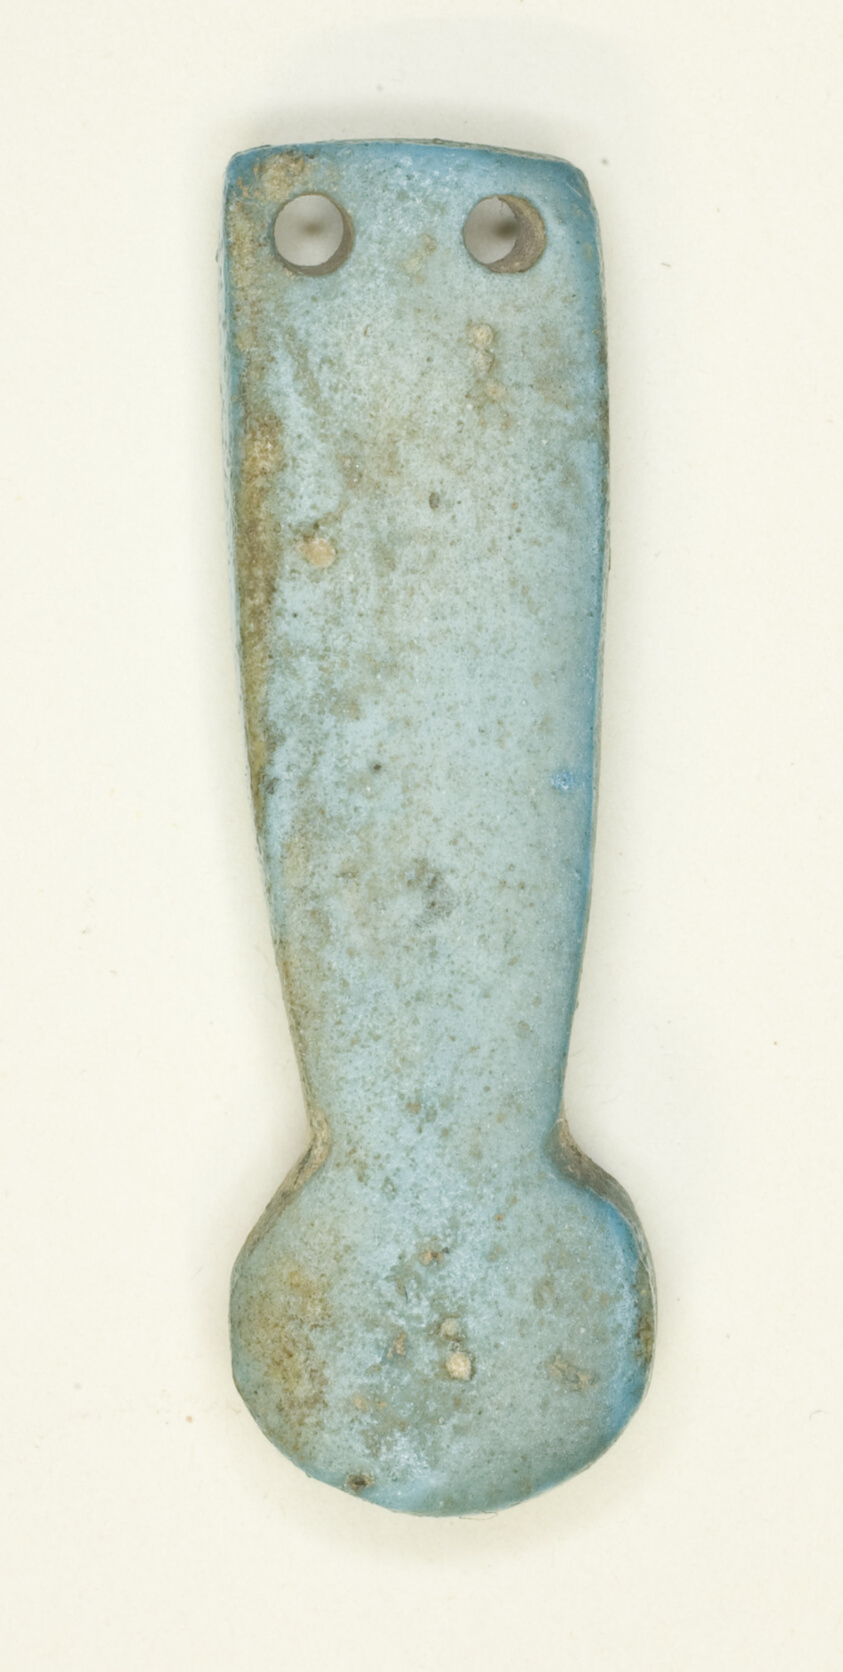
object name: Costume and Accessories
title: Amulet of a Menat Counterpoise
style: egyptian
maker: Egyptian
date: New Kingdom, Dynasty 18 (about 1550–1295 BCE)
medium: Faience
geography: Egypt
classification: amulet; jewelry; ceramics; ancient art; costume; faïence (composite material)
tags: necklace